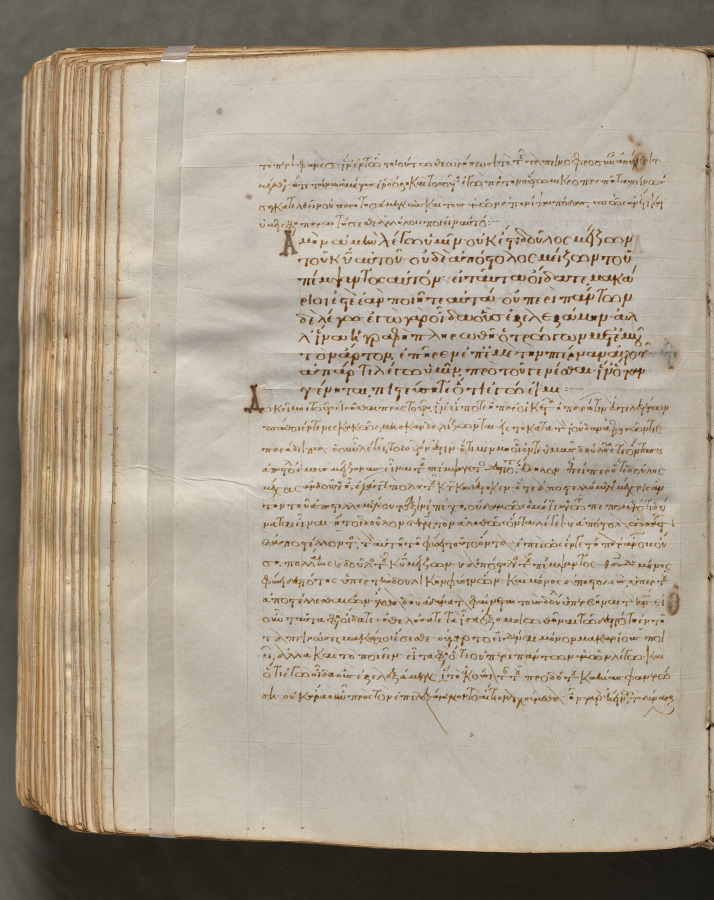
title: Text, folio 389 (verso), from a Gospel Book with Commentaries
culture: Byzantium, Constantinople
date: c. 1000–1100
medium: ink, tempera, and gold on vellum; leather binding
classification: Bound Volume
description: Each of the four gospels in this book opens on a page with brilliantly illuminated borders depicting the author of the text as well as birds—principally peacocks, symbols of the immortality of the soul—and fountains, representing the fountain of life and the salvation of the soul. This volume consists of 428 leaves with texts in Greek. Its level of sophistication suggests that it was probably written and decorated in a monastery in Constantinople.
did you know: Gospel books were carried in procession through Byzantine churches.